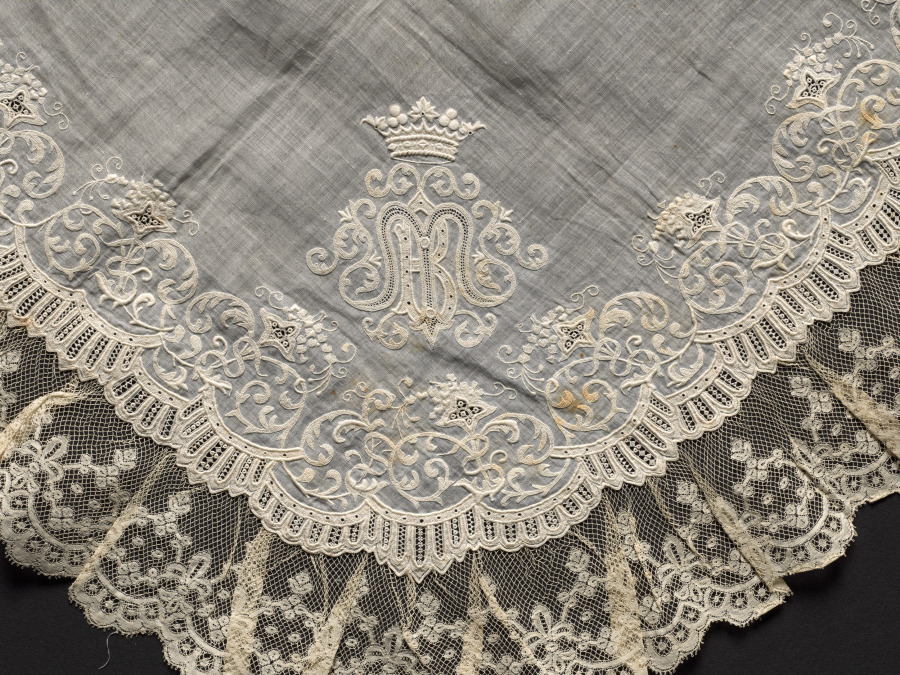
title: Lace Handkerchief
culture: Switzerland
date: 1700s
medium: linen: embroidery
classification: Embroidery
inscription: monogram "B.M." with coronet.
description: This lace handkerchief has an embroidered monogram in one corner with the initials B. M. topped by a coronet.